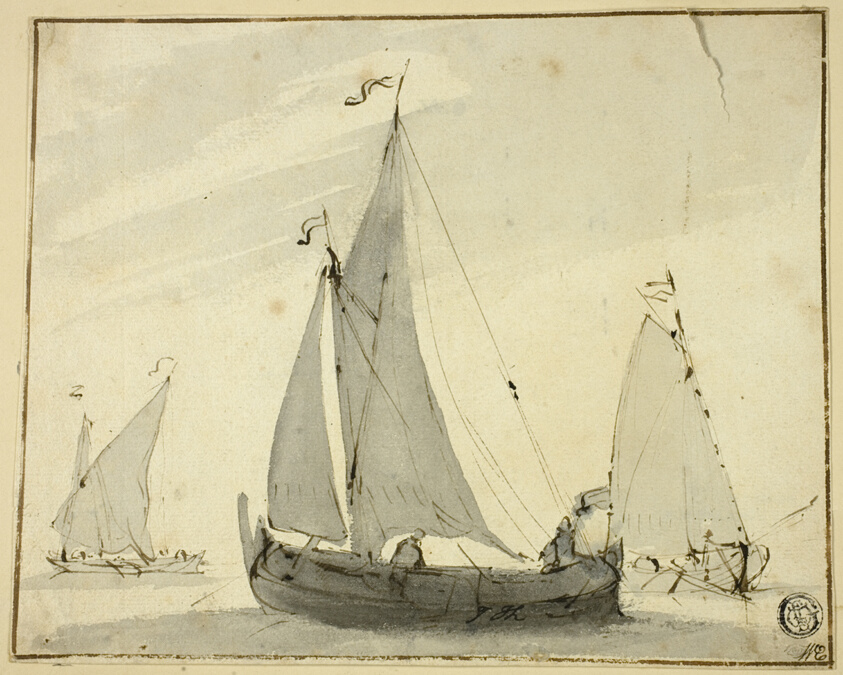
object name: Drawing and Watercolor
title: Three Sailboats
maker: Willem van de Velde, II (Dutch, 1633-1707)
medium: Pen and brown ink, with brush and gray wash, on ivory laid paper, tipped onto cream wove card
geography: Holland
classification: ink or chalk wash; drawings (visual works); prints and drawing